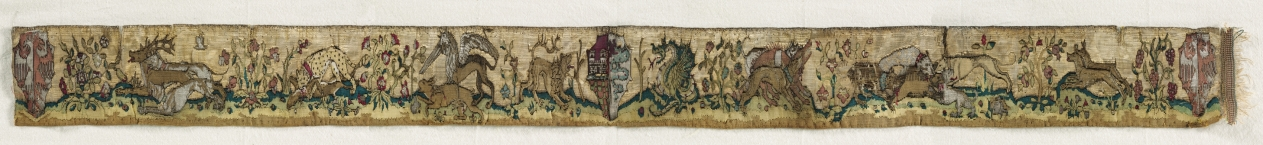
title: Tapestry Border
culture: Italy, Lombardy, Milan ?, first half of 15th century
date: 1400–1450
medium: tapestry weave; silk, silver and gold wire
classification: Tapestry